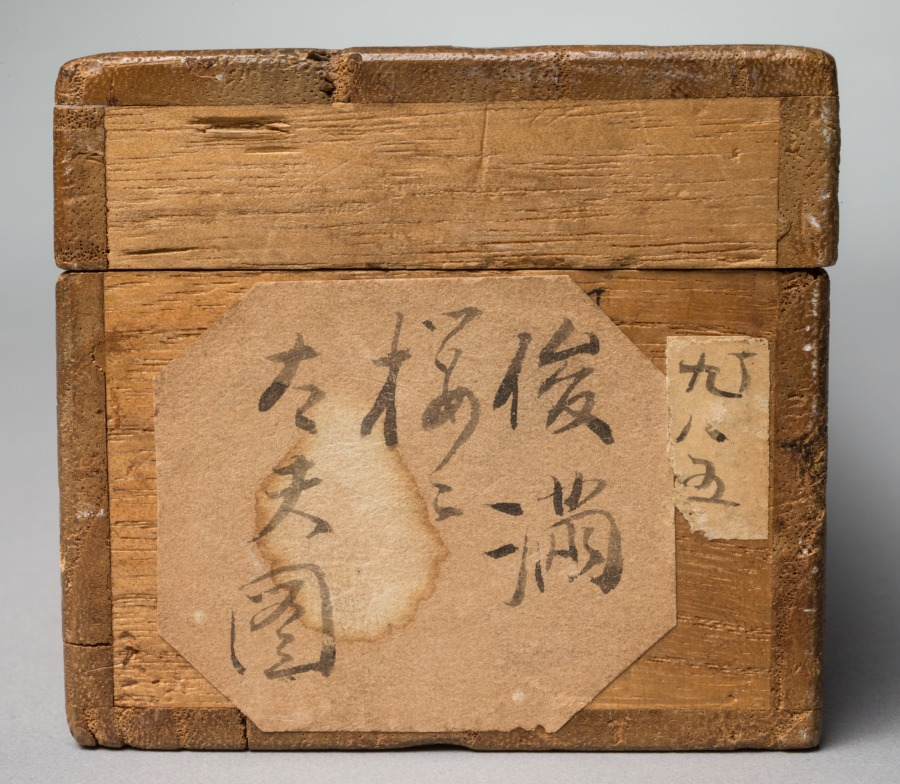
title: Woman and Two Children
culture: Japan, Meiji period (1868–1912)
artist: copy after Kubo Shunman (Japanese, 1757–1820)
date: early 1900s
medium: hanging scroll; color and gold on silk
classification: Painting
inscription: signed Kubo Shunman